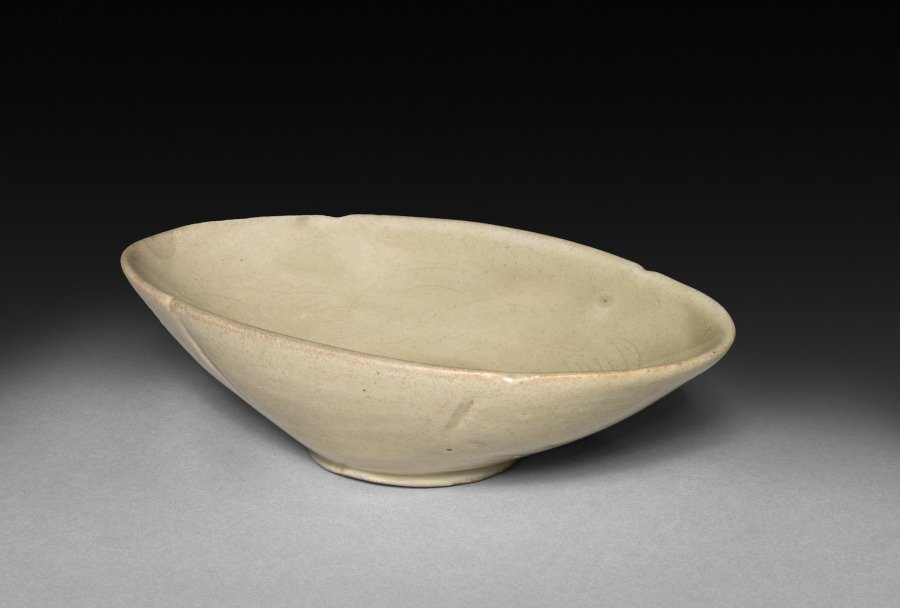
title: Chan: Oval Shaped Shallow Cup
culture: China, Tang dynasty (618-907) - Five dynasties (907-960)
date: 900s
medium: Glazed gray stoneware, Yue ware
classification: Ceramic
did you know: Four incised lines on the outside with indentations in the rim above suggest a petal form.